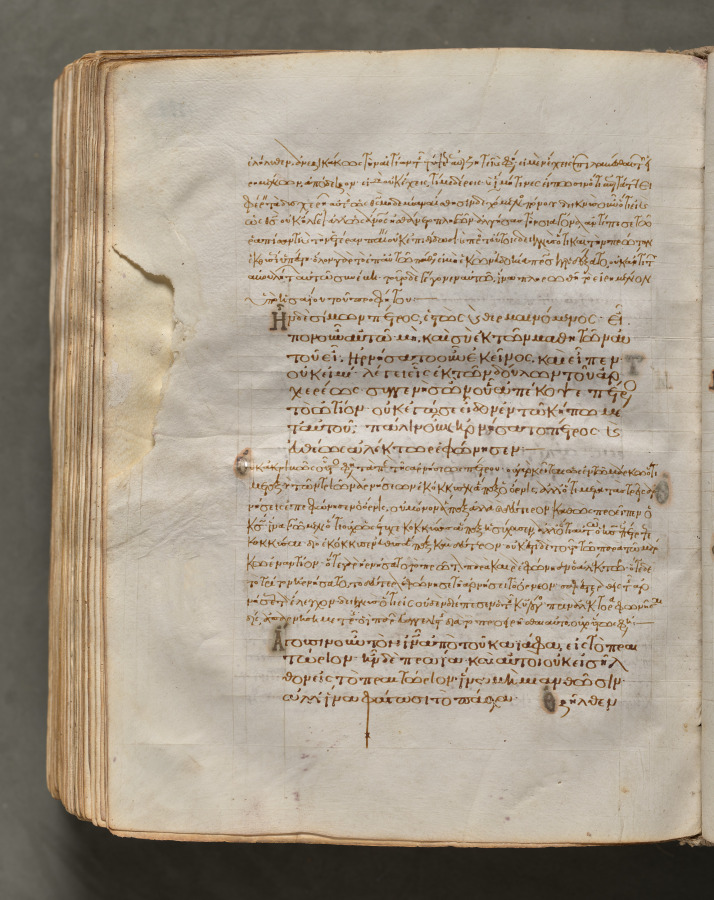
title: Text, folio 409 (verso), from a Gospel Book with Commentaries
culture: Byzantium, Constantinople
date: c. 1000–1100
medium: ink, tempera, and gold on vellum; leather binding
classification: Bound Volume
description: Each of the four gospels in this book opens on a page with brilliantly illuminated borders depicting the author of the text as well as birds—principally peacocks, symbols of the immortality of the soul—and fountains, representing the fountain of life and the salvation of the soul. This volume consists of 428 leaves with texts in Greek. Its level of sophistication suggests that it was probably written and decorated in a monastery in Constantinople.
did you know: Gospel books were carried in procession through Byzantine churches.